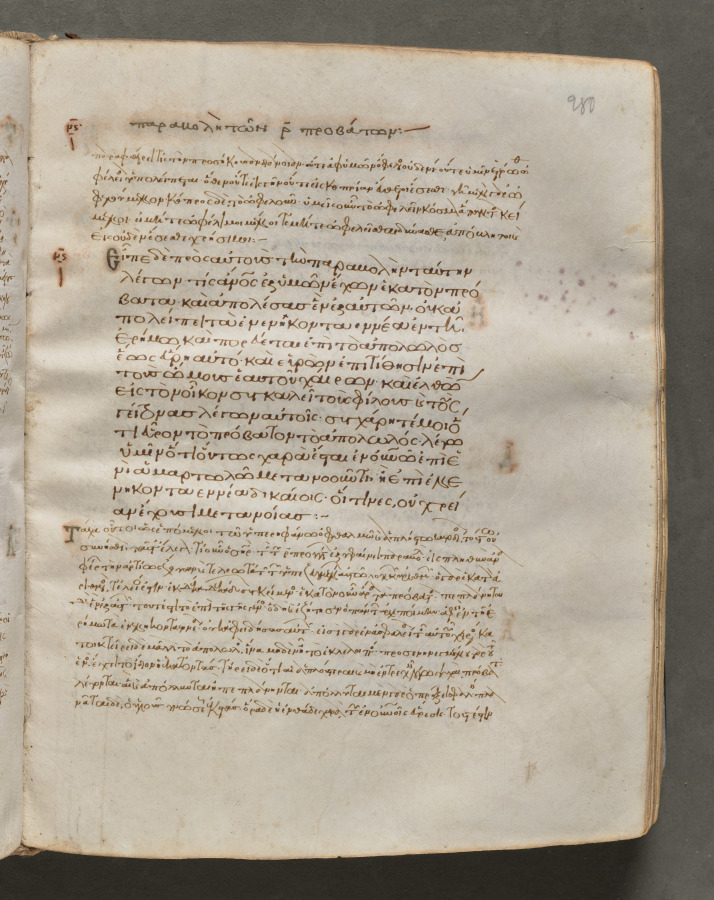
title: Text, folio 280 (recto), from a Gospel Book with Commentaries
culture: Byzantium, Constantinople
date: c. 1000–1100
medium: ink, tempera, and gold on vellum; leather binding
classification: Bound Volume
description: Each of the four gospels in this book opens on a page with brilliantly illuminated borders depicting the author of the text as well as birds—principally peacocks, symbols of the immortality of the soul—and fountains, representing the fountain of life and the salvation of the soul. This volume consists of 428 leaves with texts in Greek. Its level of sophistication suggests that it was probably written and decorated in a monastery in Constantinople.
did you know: Gospel books were carried in procession through Byzantine churches.